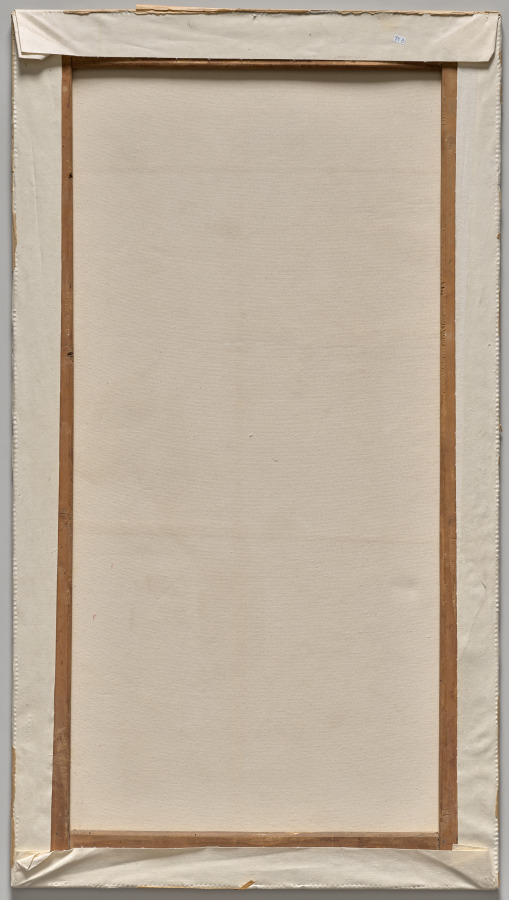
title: Gusu Beauty – Winter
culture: China, Qing dynasty (1644–1911), Qianlong period (1736–95)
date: 1736–95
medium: Polychrome woodblock print; ink and color on paper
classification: Print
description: In the 1600s, printing flourished in such Jiangnan cities as Nanjing, Suzhou, Hangzhou, and Huizhou, evolving from privately enjoyed illustrated books printed in color to more commercialized single-sheet color prints that were hung on walls and became part of the rich urban visual culture.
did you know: Woodblock printing in color reached a height in China in the 1600s to 1700s. The prints were executed by means of sets of separate blocks, each carved to print a different color.